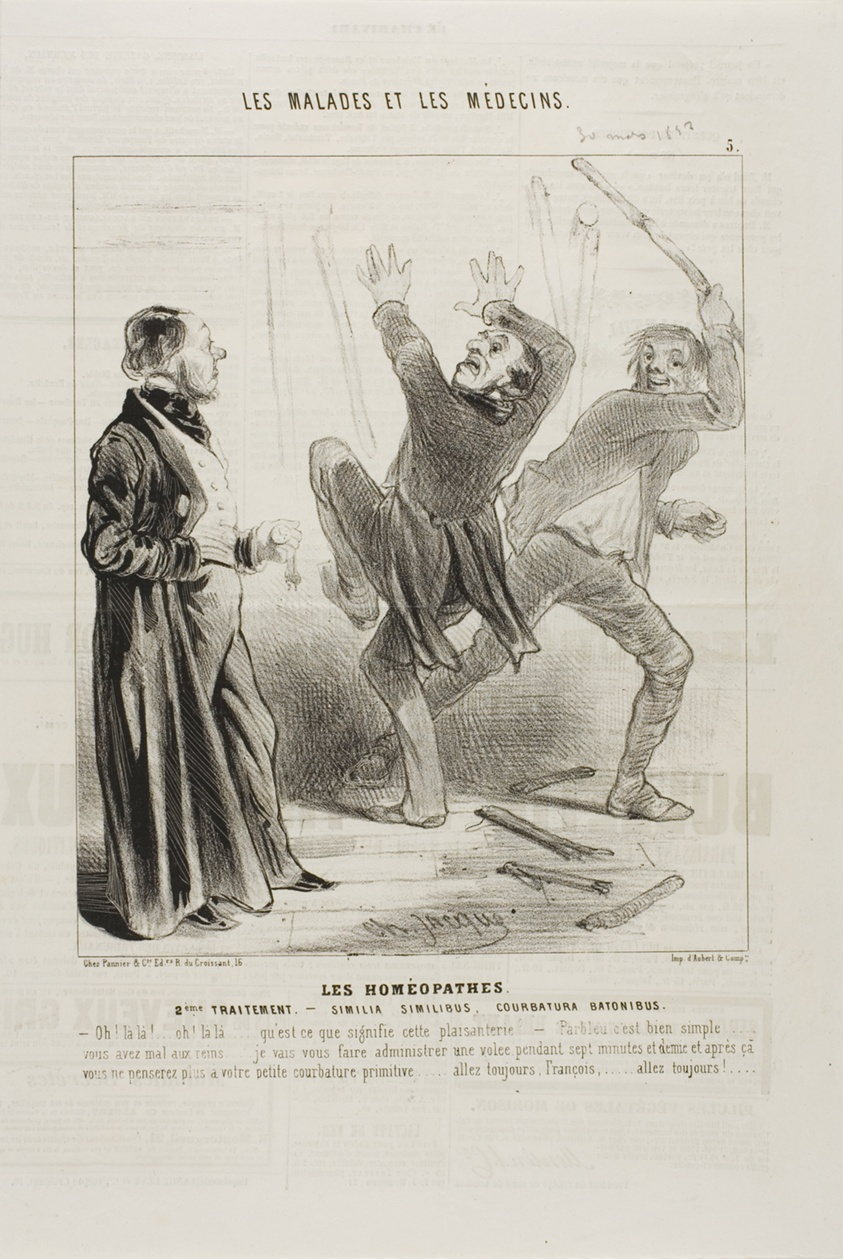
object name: Print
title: The Homeopaths: Second Treatment (plate 5)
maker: Charles Émile Jacque (French, 1813-1894)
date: 1843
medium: Lithograph in black on ivory wove paper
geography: France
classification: lithograph; print; prints and drawing